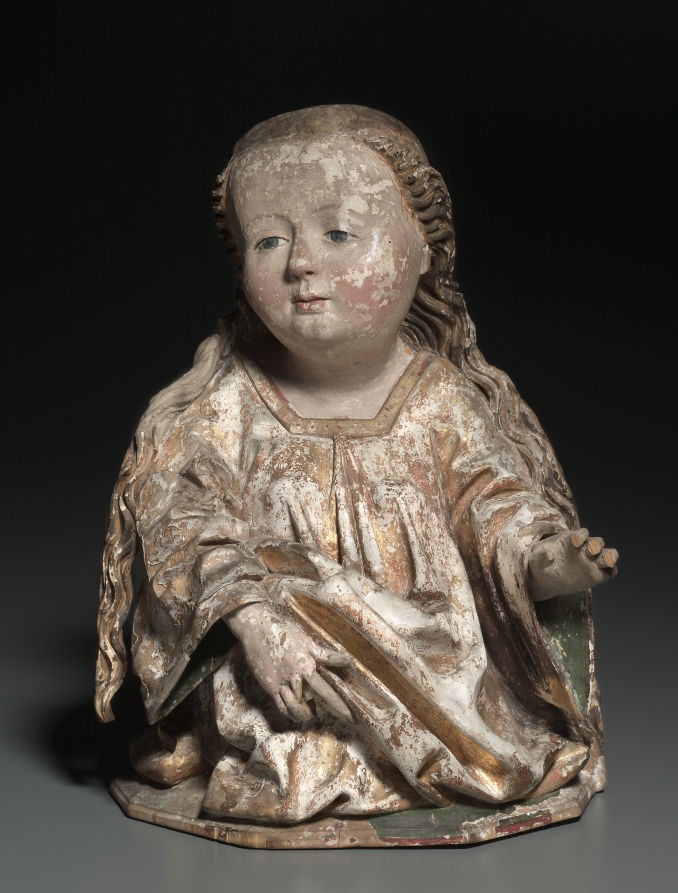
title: Female Bust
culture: Austria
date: c. 1470–1500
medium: painted and gilded lindenwood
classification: Sculpture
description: This female bust is part of a series of three in the museum's collection. The identity of the figures has been speculated by scholars but without resolution. Because this and the other female busts in the series do not retain their attributes, it is difficult to know their original purpose. It is possible that they may have once formed a group of female saints from the predella of a large altarpiece. Since the sculpture is not carved in the round, this hypothesis has merit. Another recent proposal is that this and the other sculptures may be from a series of female busts representing the wise and foolish virgins referenced in Matthew 25:1-13, a parable by Jesus admonishing listeners to be spiritually prepared.